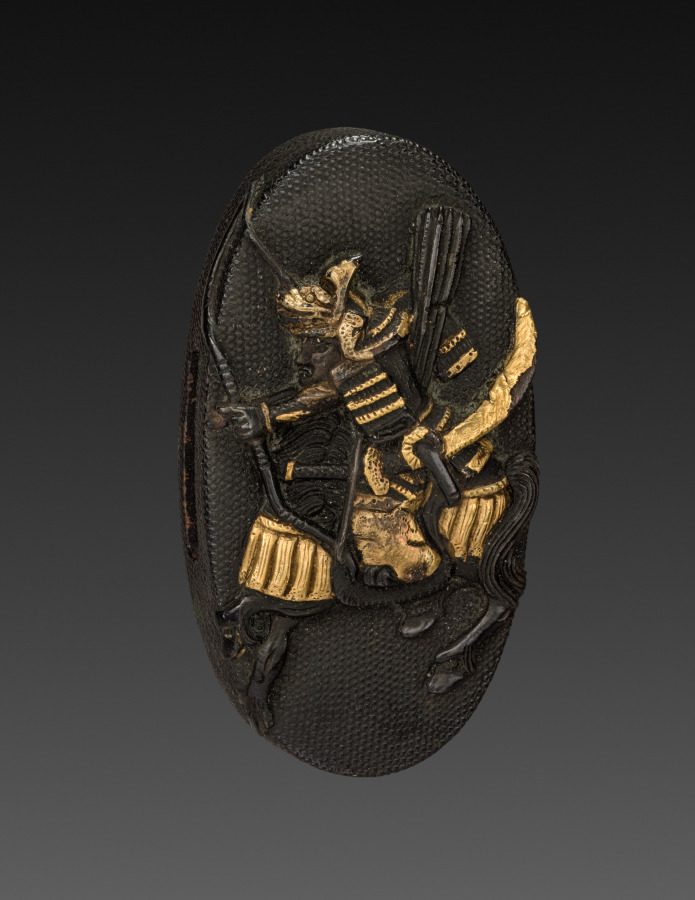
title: Sword-Hilt Pommel (Kashira)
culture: Japan, Edo period (1615–1868)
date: 1700–1850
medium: shakudo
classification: Arms and Armor